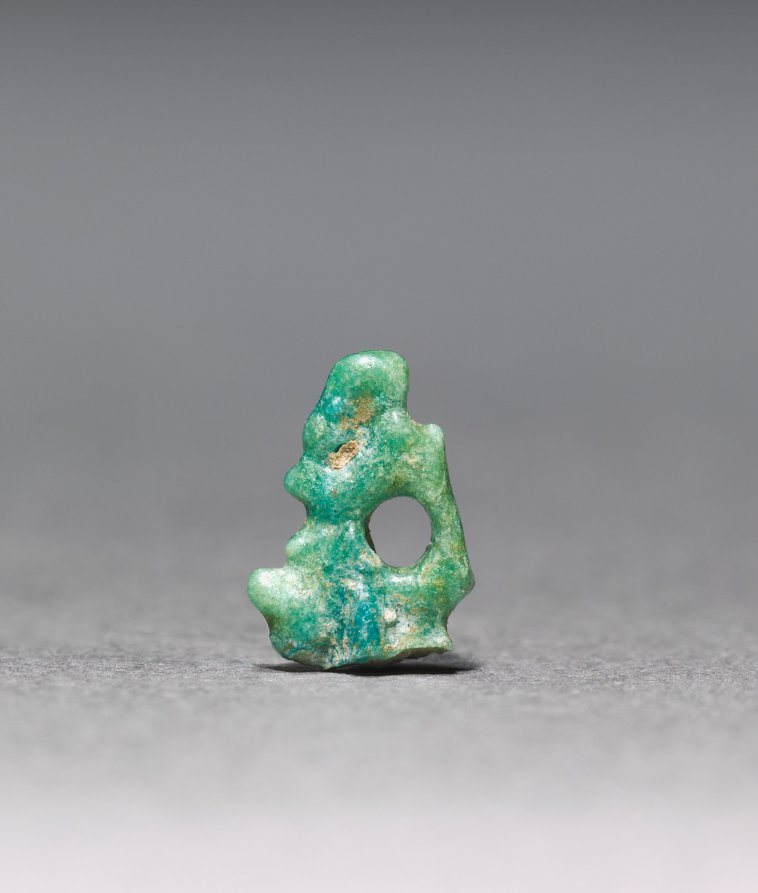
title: Amulet of an Unidentified Shape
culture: Egypt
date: 2123–2040 BCE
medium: turquoise green faience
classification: Amulets